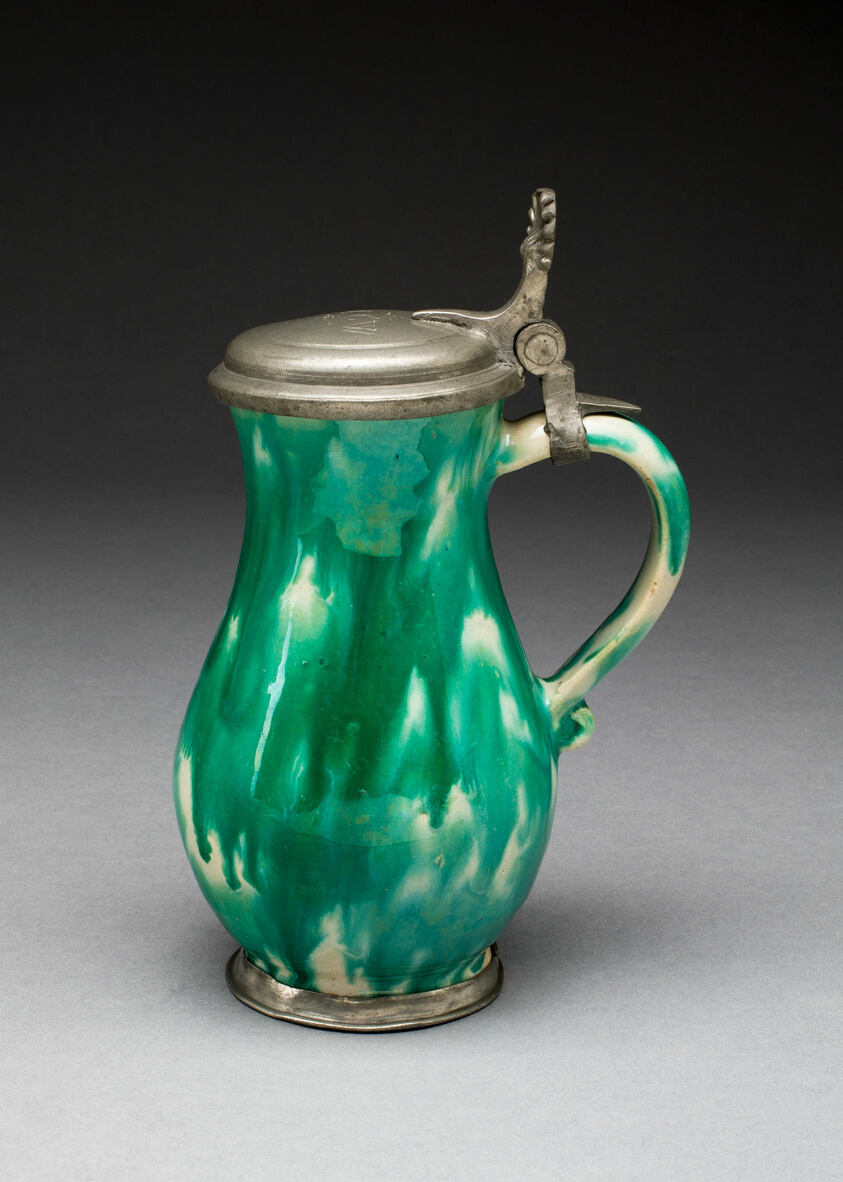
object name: Ceramics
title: Wine Jug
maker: Austria, Gmunden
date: 1700/25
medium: Tin-glazed earthenware (faience) and pewter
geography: Gmunden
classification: earthenware; european decorative arts; ceramics